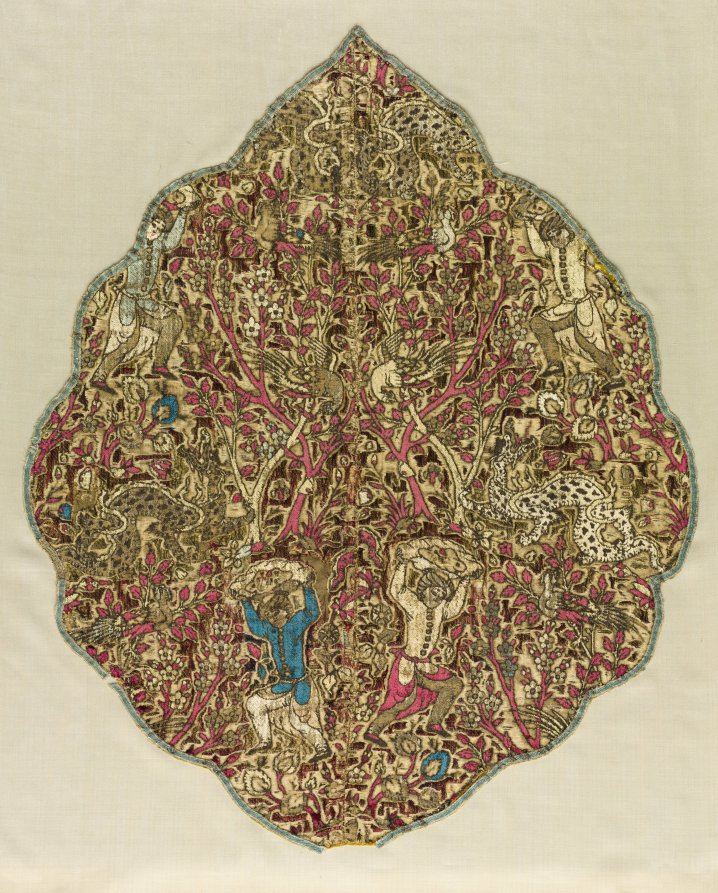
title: Tent panel of a dragon slayer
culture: Iran, Yazd[?], reign of Shah Tahmasp, Safavid period (1501-1736)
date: 1550–99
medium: velvet, cut, voided, brocaded, and pile-warp substitution: silk and gilt-metal strips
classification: Velvet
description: Iranian luxury textiles of the 16th and 17th centuries are renowned for representing human figures and for creating the most colorful velvets ever woven. Here, a dragon slayer dressed in 16th-century court attire is poised to hurl a boulder at a snarling dragon in a landscape with blossoming fruit trees and perched fowl. Even with faded silk pile this velvet contains many nuanced tones. As many as 12 colors of velvet pile were achieved by weavers who skillfully replaced colored pile warp during weaving. This velvet medallion decorated the interior of an imperial tent, possibly donated by Shah Tahmasp to an Ottoman Turkish sultan. Captured after the Ottoman siege of Vienna in 1683, the medallion was claimed as war booty by the European commander-in-chief Prince Sanguszko of Poland by whose name this and other panels are known.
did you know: Originally the ivory ground was covered with costly gilt-metal strips, which may have been removed for their monetary value.